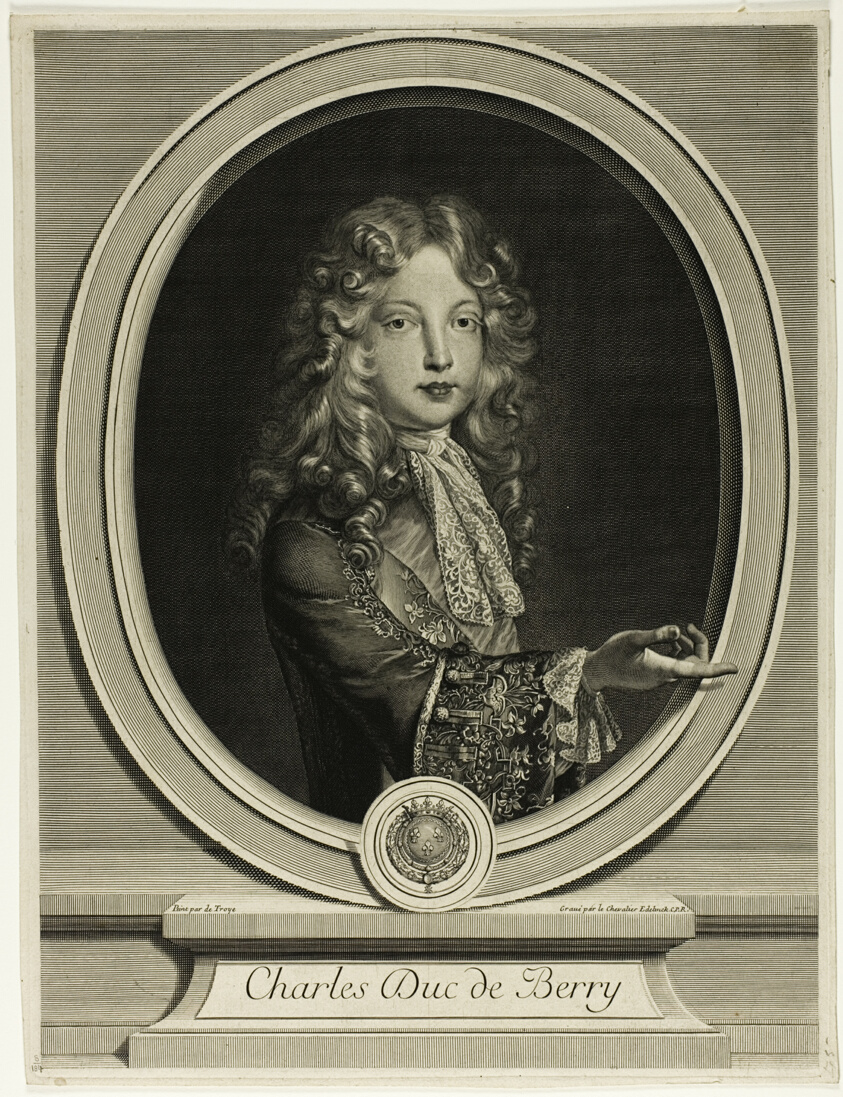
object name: Print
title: Charles Duc de Berry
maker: Gérard Edelinck (French, born Flanders, 1640-1707); after Jean François de Troy (French, 1679-1752)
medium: Engraving on cream wove paper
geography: France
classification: engraving; print; prints and drawing